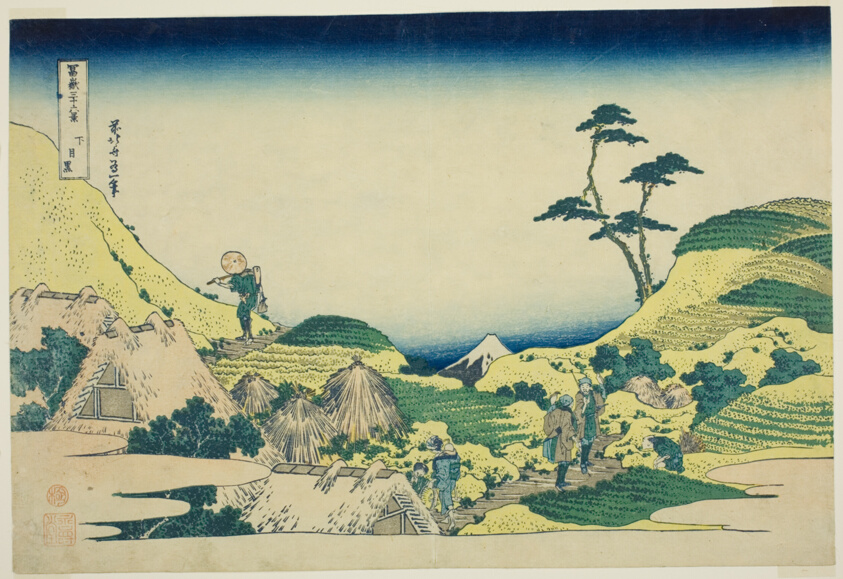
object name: Print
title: Lower Meguro (Shimo Meguro), from the series "Thirty-six Views of Mount Fuji (Fugaku sanjurokkei)"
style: Japanese (culture or style)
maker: Katsushika Hokusai 葛飾 北斎; Japanese, 1760-1849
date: c. 1830/33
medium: Color woodblock print; oban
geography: Japan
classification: woodblock print; print; asian art